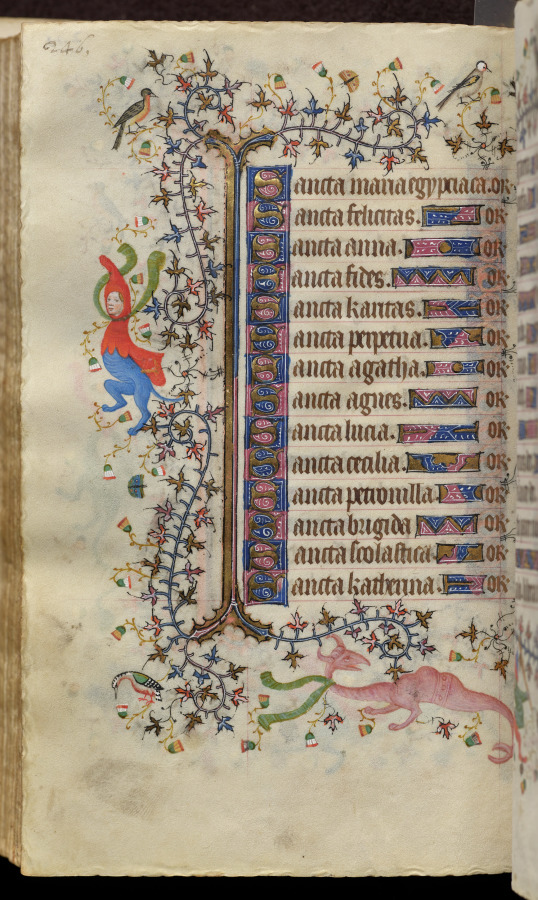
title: Hours of Charles the Noble, King of Navarre (1361-1425): fol. 123v, Text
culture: France, Paris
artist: Master of the Brussels Initials and Associates (French)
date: c. 1405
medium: ink, tempera, and gold on vellum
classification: Bound Volume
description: This precious volume was obviously highly prized by its owner, the French-born King of Navarre, who had his coat of arms painted on no less than twenty folios. Rather than directly commissioning this manuscript from a specific workshop, it seems that Charles the Noble acquired his book of hours -- perhaps ready-made for the luxury market -- while on a trip to Paris in 1404-05. A collaborative effort, six painting styles are evidenced within the pages of this codex, those of two Italians, two Frenchmen, and two Netherlanders. The painter who was responsible for the planning and decoration of the book, and who produced seventeen of the large miniatures, was a Bolognese artist known as the Master of the Brussels Initials. His principal assistant, responsible for most of the borders, was a Florentine who signed his name "Zecho" da Firenze on folio 208 verso.